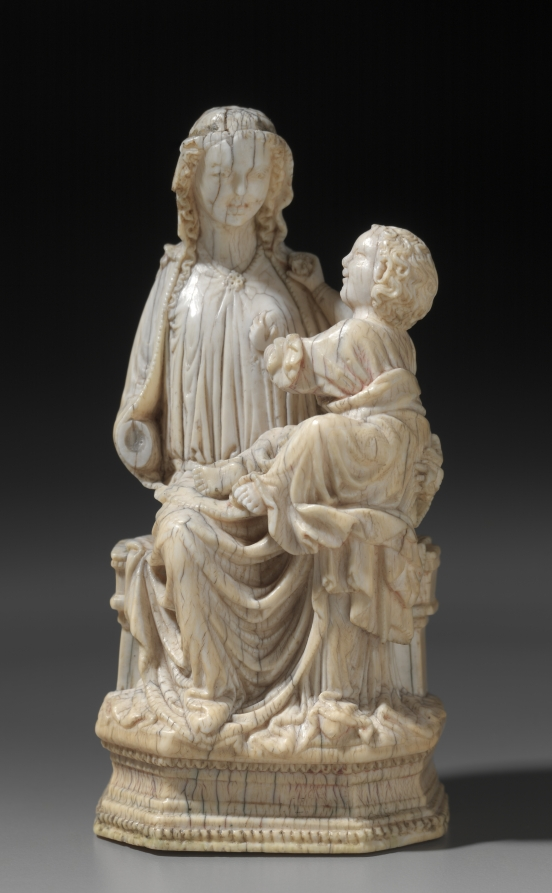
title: Enthroned Virgin and Child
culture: Mosan, Valley of the Meuse, Gothic period, 13th century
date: c. 1250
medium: ivory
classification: Ivory